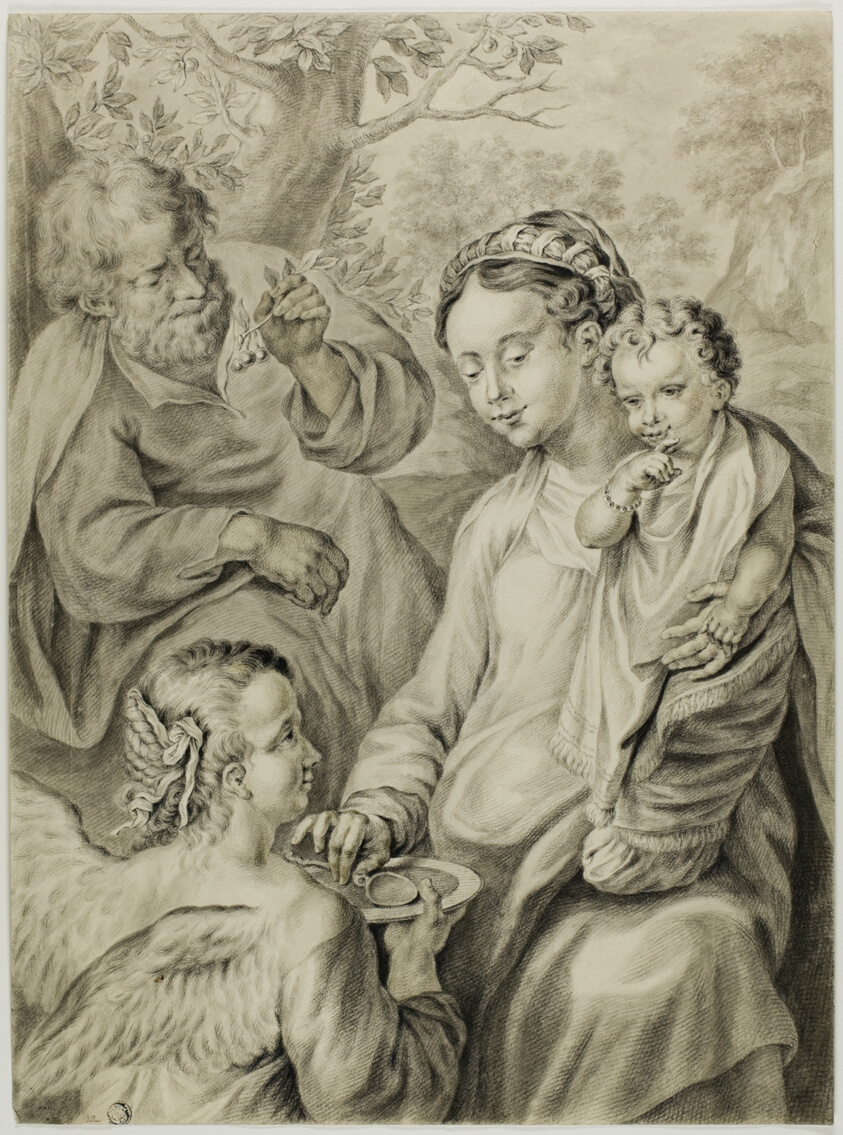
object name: Drawing and Watercolor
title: The Rest on the Flight into Egypt, known as The Madonna della Pappa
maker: Possibly Abraham Delfos (Dutch, 1731-1820); after Francesco Vanni (Italian, 1563-1610)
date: 1700s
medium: Charcoal, with brush and gray wash, and touches of black crayon, on ivory wove paper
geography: Netherlands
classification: charcoal; drawings (visual works); prints and drawing